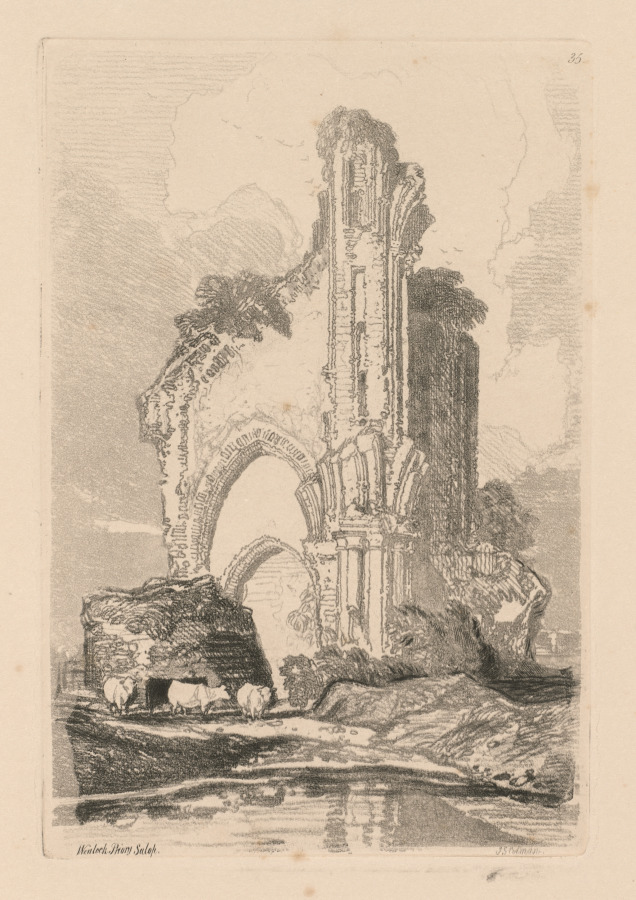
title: Liber Studiorum: Plate 35, Wenlock Priory, Salop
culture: England, 19th century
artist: John Sell Cotman (British, 1782–1842)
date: 1838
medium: softground etching, from a bound volume containing 48 plates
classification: Bound Volume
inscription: In plate, within image, upper right: 35; in plate, below image, lower left: Wenlock Priory Salop.; in plate, below image, lower right: JS Cotman.